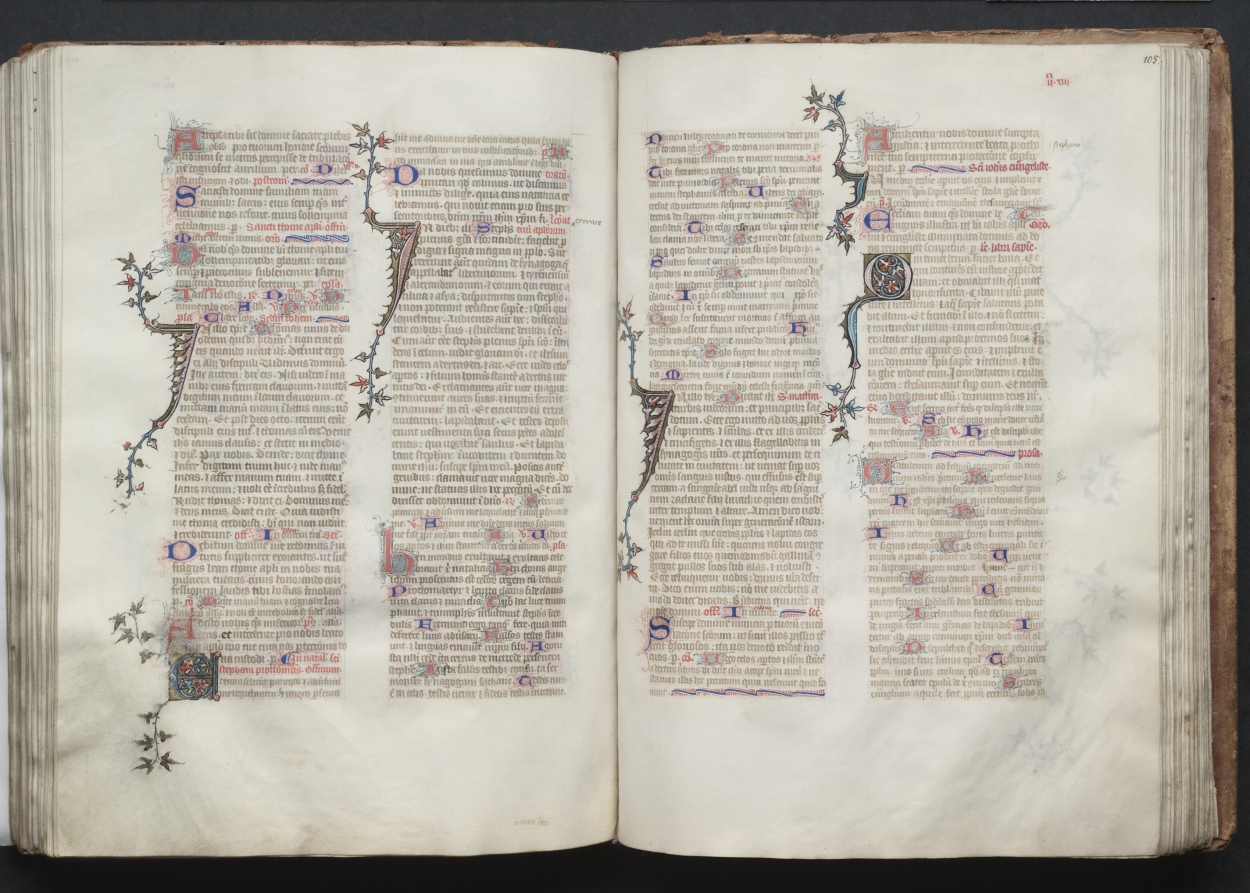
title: The Gotha Missal: Fol. 105r, Text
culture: France, Paris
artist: Master of the Boqueteaux (French)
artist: and Workshop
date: c. 1375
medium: ink, tempera, and gold on vellum; blind-tooled leather binding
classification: Bound Volume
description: The style and quality of this manuscript's decoration is typical of deluxe Parisian books made for aristocratic or royal patrons. Most of the book's decoration appears to be the work of the Master of the Boqueteaux, an artist active at the court of King Charles V (died 1380). His style was apparently shared by a number of book illuminators working in and around Paris. It is very possible that the Gotha Missal belonged to Charles V, but is not provable because the manuscript has no royal portraits and lacks a colophon. Given the book's magnificent decoration, however, it would seem that it was produced for a Valois prince, if not for the king himself. The manuscript receives its name from the German dukes of Gotha, its later owners.